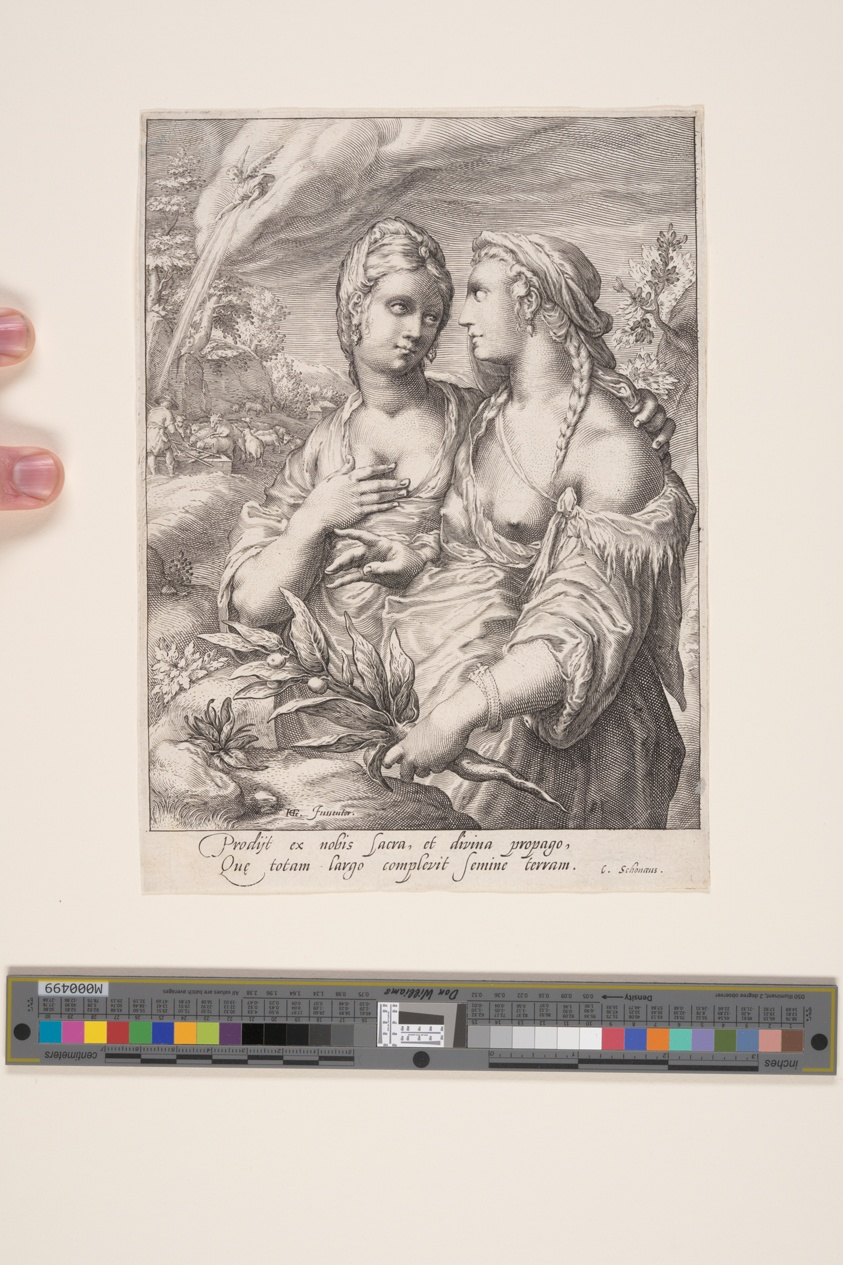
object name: Print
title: Lea and Rachel, from The Wives of the Patriarchs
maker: Jacob Matham (Dutch, 1571–1631); after Hendrick Goltzius (Dutch, 1558–1617)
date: 1597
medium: Engraving on laid paper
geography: Netherlands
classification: print; engraving; paper; prints and drawing